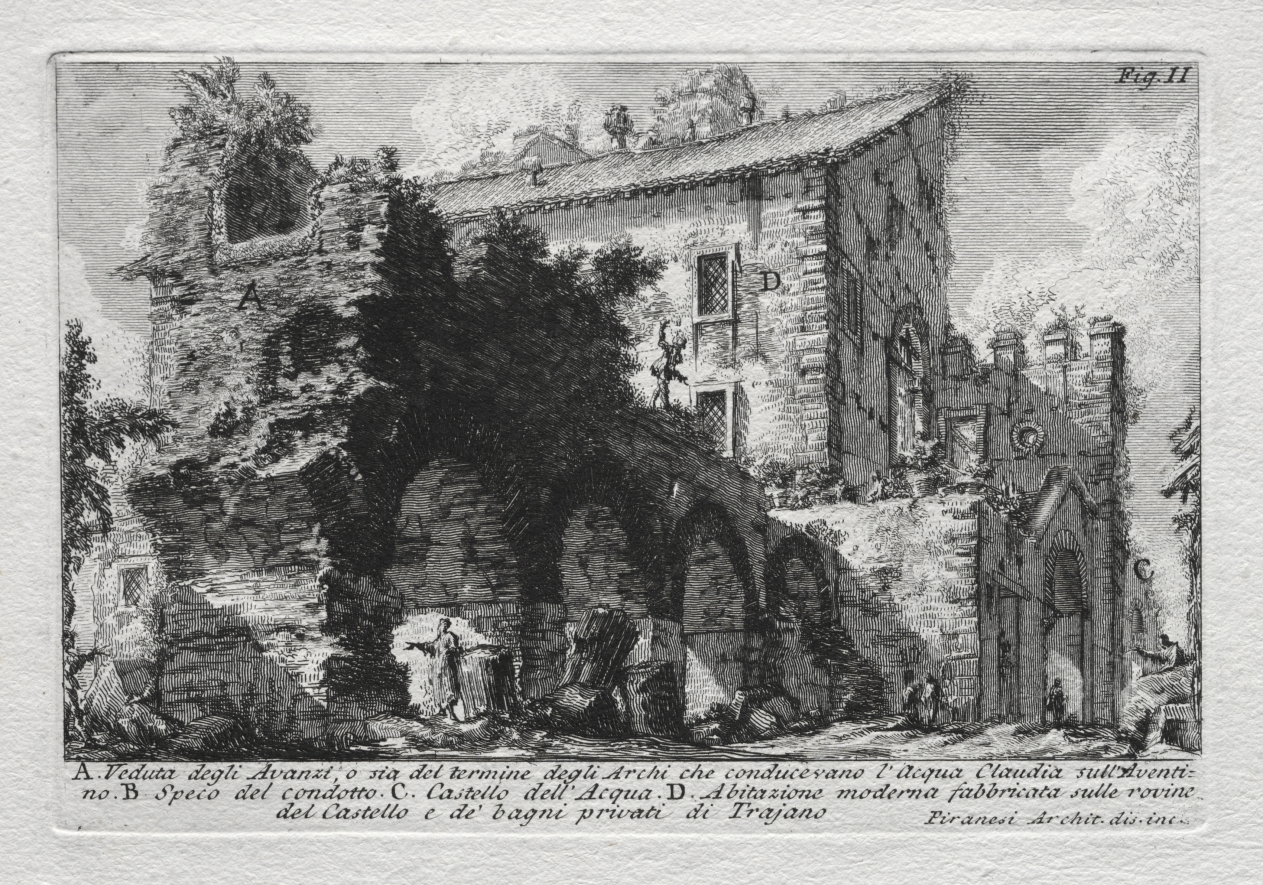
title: Veduta degli Avanzi, o sia del termine degli Archi che conducevano l'Acqua Giulia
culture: Italy, 18th century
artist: Giovanni Battista Piranesi (Italian, 1720–1778)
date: 1756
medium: etching and engraving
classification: Print